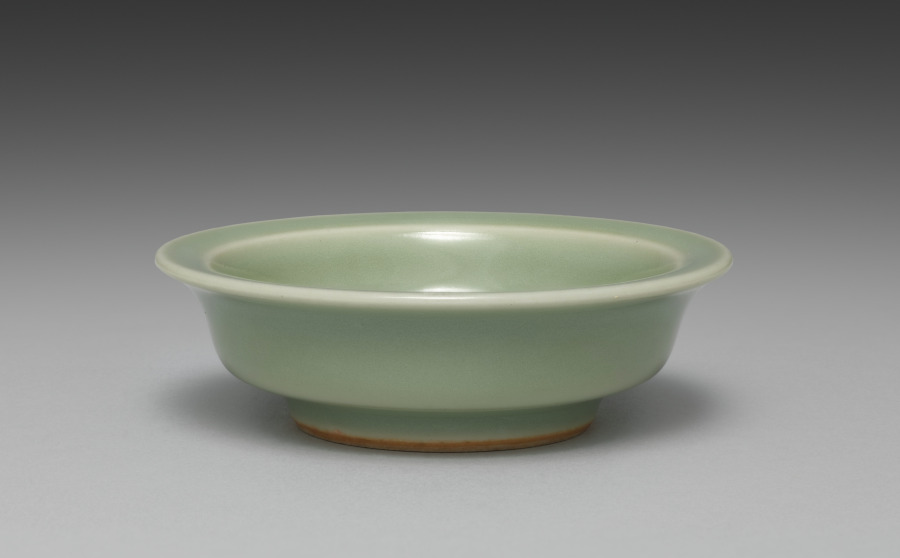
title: Saucer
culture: Japan, Meiji period (1868–1912)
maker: Seifū Yohei III (Japanese, 1851–1914)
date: 1893–1914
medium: One from a set of ten dishes; porcelain with green glaze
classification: Ceramic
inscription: 清風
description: Yohei III’s main output for his sophisticated clientele was in the form of tea sets and dining sets. He created a range of dishes in green glazes. He often produced in pairs, sets of five, or sets of ten. For this set of ten small dishes in a simple, round form that emphasizes the glaze above all, the box lid designates the piece as seiji, or green-glazed porcelain, using a general term for the extensive palette of green glazes often called celadon in English. The box lid further identifies the dishes themselves as tōchō, literally “bean-sized saucers,” a size that makes them suitable for dipping sauces.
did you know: The ten dishes in this set are stored in stacks of five in a two-compartment box.